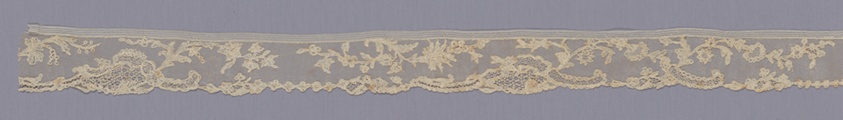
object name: Textile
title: Border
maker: France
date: 1750s/60s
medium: Linen, needle lace of a type known as "Point d'Alençon"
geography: France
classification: textile; lace - needle; lace